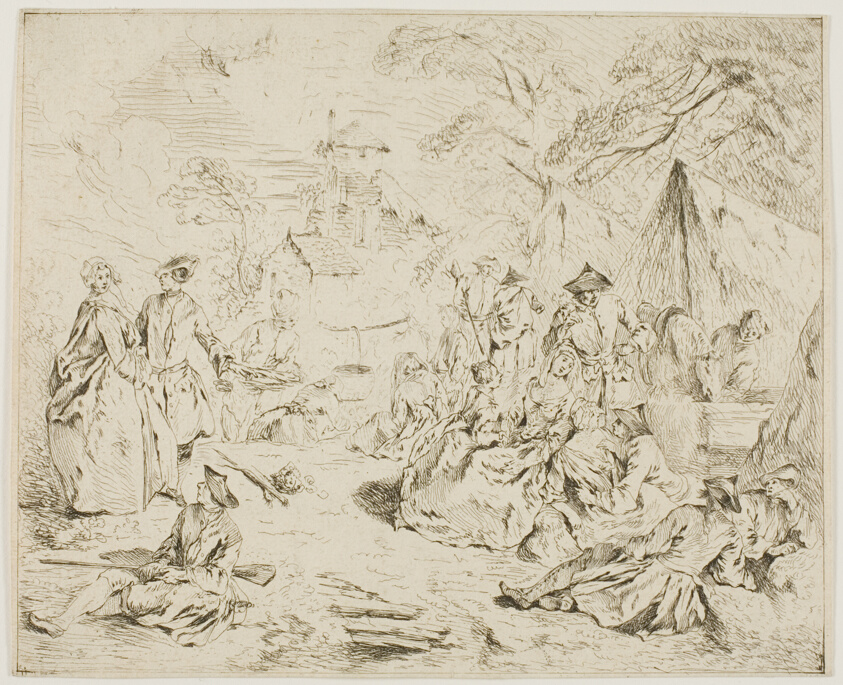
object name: Print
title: Troops Resting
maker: Jean Baptiste Joseph Pater; French, 1695-1736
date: 1720–25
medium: Etching on paper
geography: France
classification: etching; print; prints and drawing